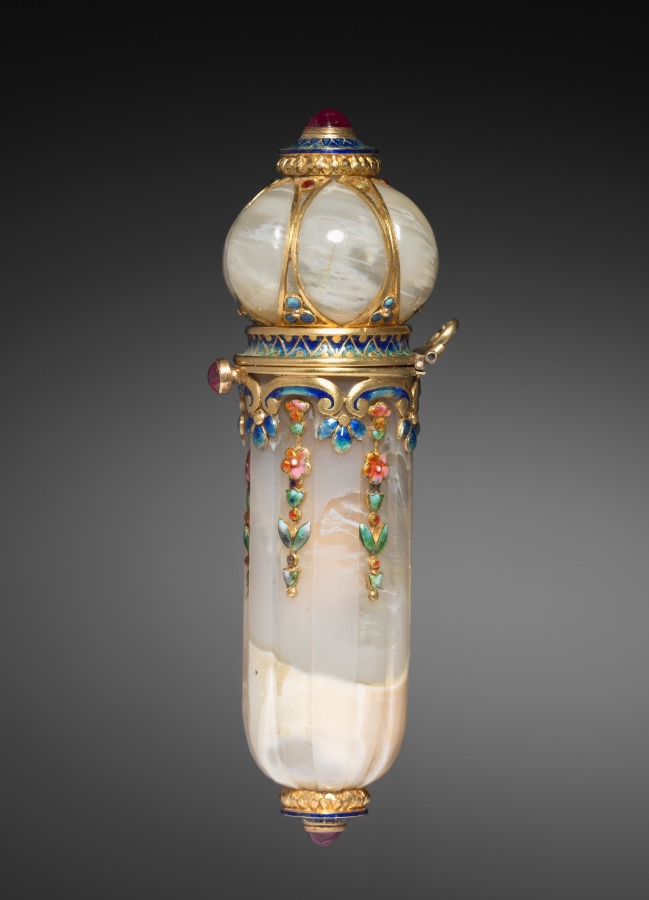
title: Perfume Vial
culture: France, Paris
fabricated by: Tecla Firm (French)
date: c. 1900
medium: agate with enamel, gold, rubies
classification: Miscellaneous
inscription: "Tiffany & Co." engraved at edge of top.